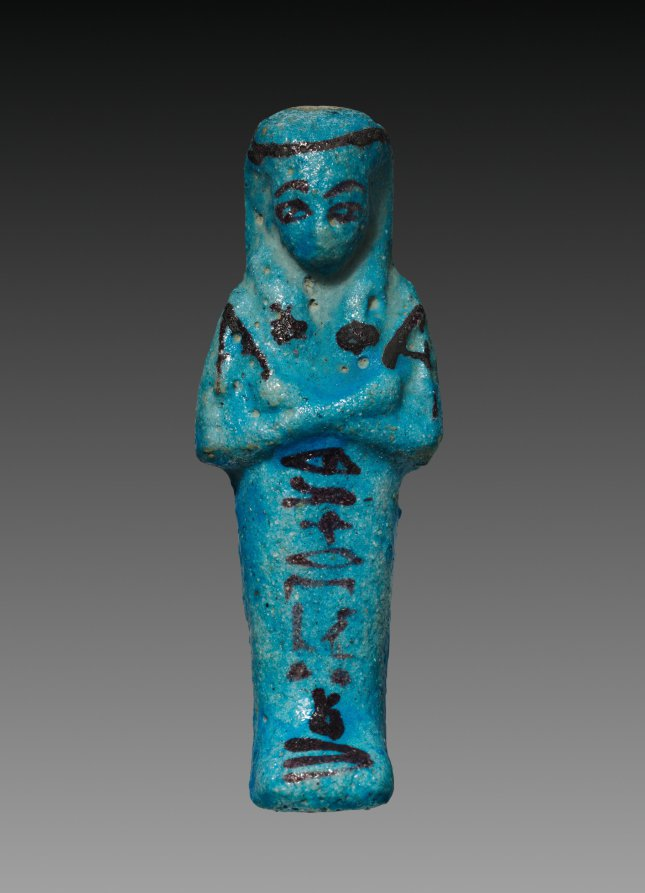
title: Shawabty of Herytwebkhet (Harweben)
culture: Egypt, Third Intermediate (1069–715 BCE), Dynasty 21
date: 1000–956 BCE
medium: turquoise faience with black decoration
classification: Funerary Equipment